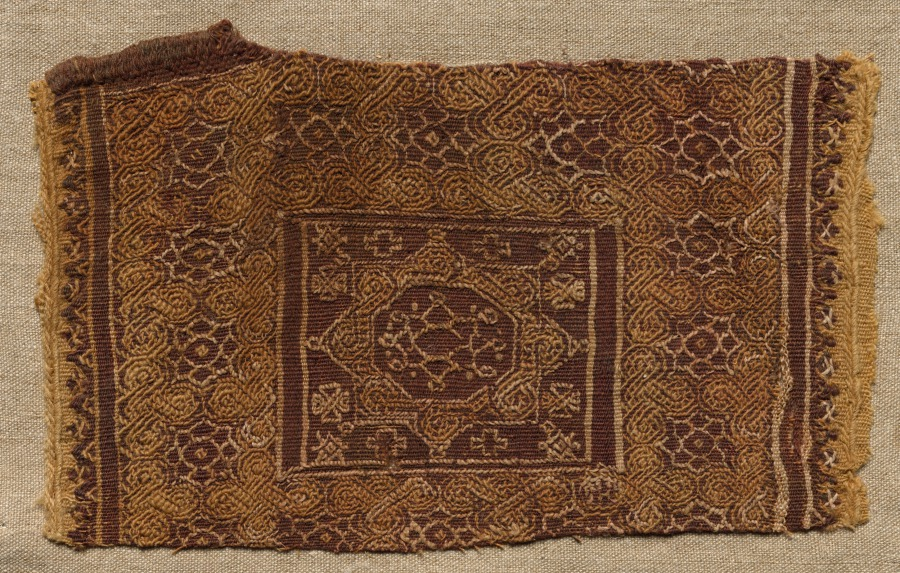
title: Fragment, Probably Part of a Clavus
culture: Egypt, Byzantine period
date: 300s–600s CE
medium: tabby weave, inwoven tapestry ornament; wool and linen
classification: Textile